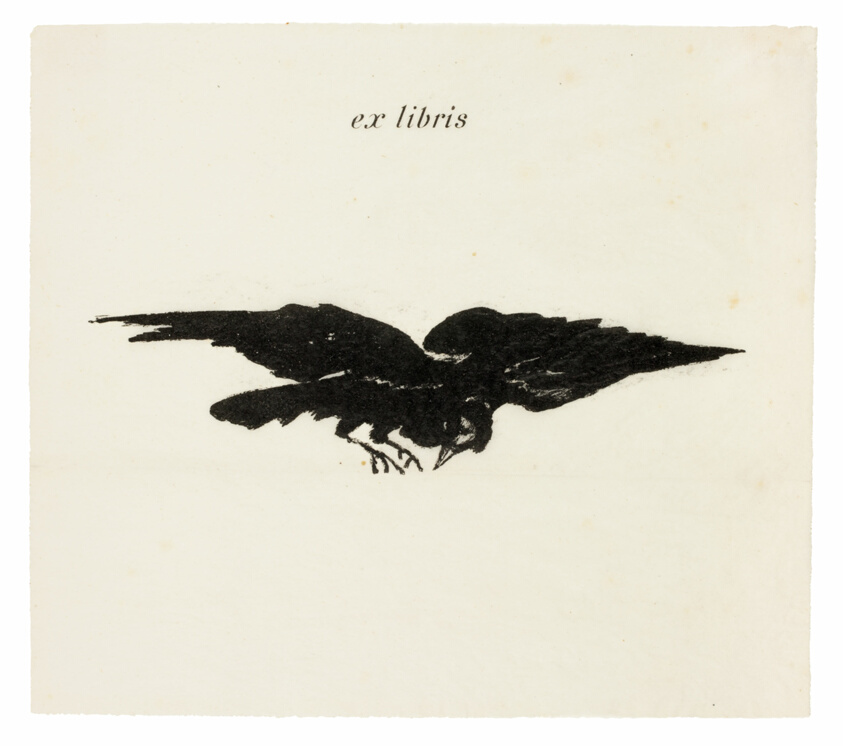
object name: Print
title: Flying Raven: ex libris, from The Raven (Le Corbeau)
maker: Édouard Manet (French, 1832-1883); written by Edgar Allan Poe (American, 1809-1849); translated and produced by Stéphane Mallarmé (French, 1842-1898); printed by Lefman et Cie. (French, 19th century); published by Richard Lesclide (French, 1825-1892)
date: 1875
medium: Transfer lithograph in black on ivory parchment paper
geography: France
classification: gillotage; print; prints and drawing